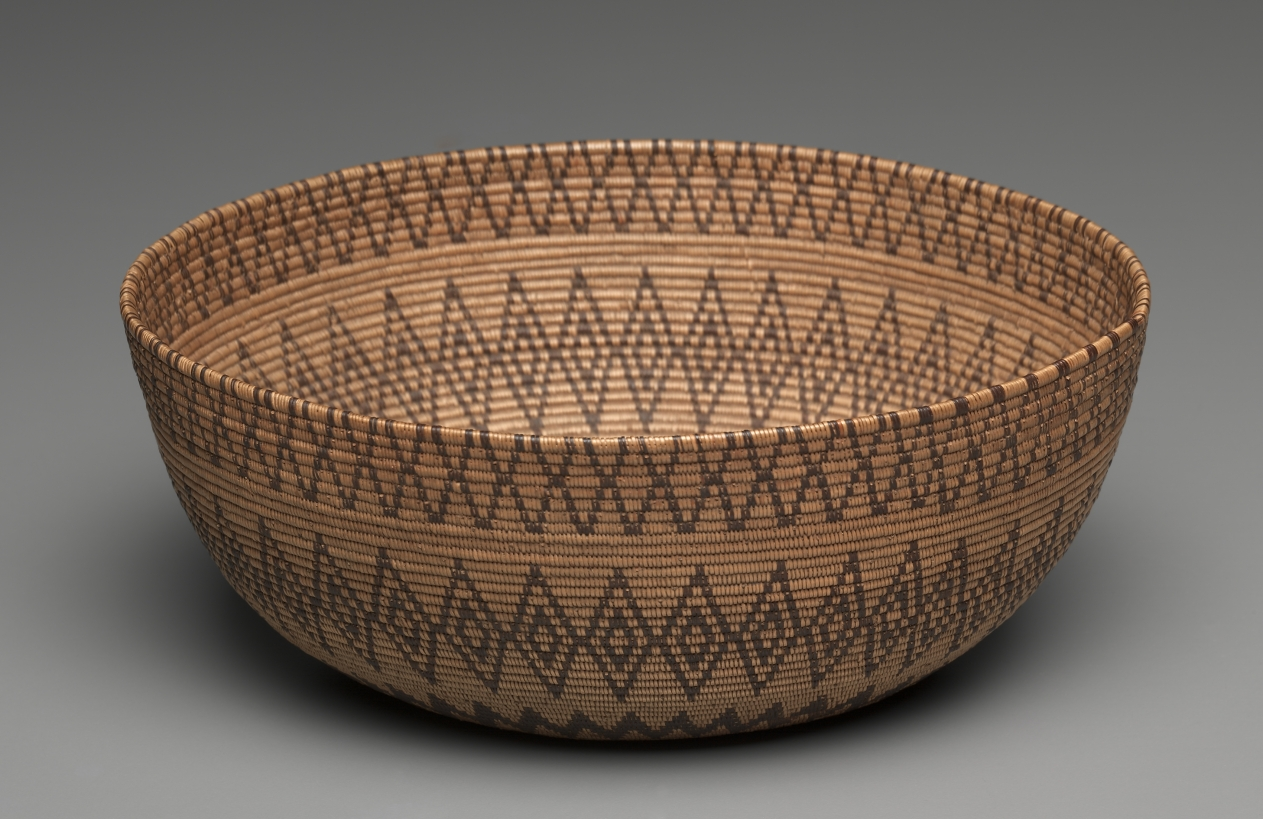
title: Bowl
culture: Great Basin, Timbisha Shoshone (Panamint)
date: 1900–1905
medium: sumac, bulrush; coiled (3 rods)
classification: Basketry